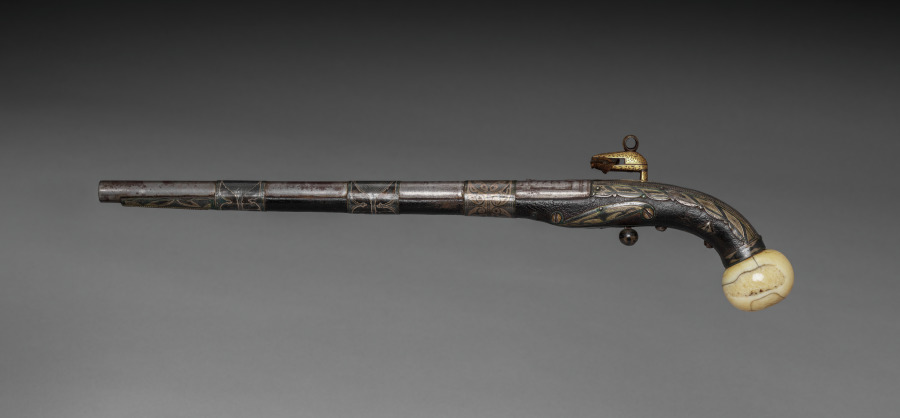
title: Ball-Butted Miquelet-Lock Pistol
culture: Causasus, Daghestan, 19th century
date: c. 1850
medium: steel, silver, gold inlay, leather, ivory ball butt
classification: Arms and Armor